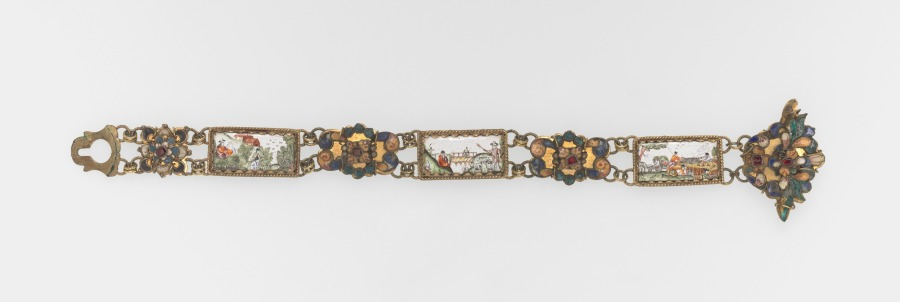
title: Belt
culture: Netherlands, early 18th century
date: early 1700s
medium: enamel on copper with gilt metal mounts and cloisonné medallions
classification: Enamel